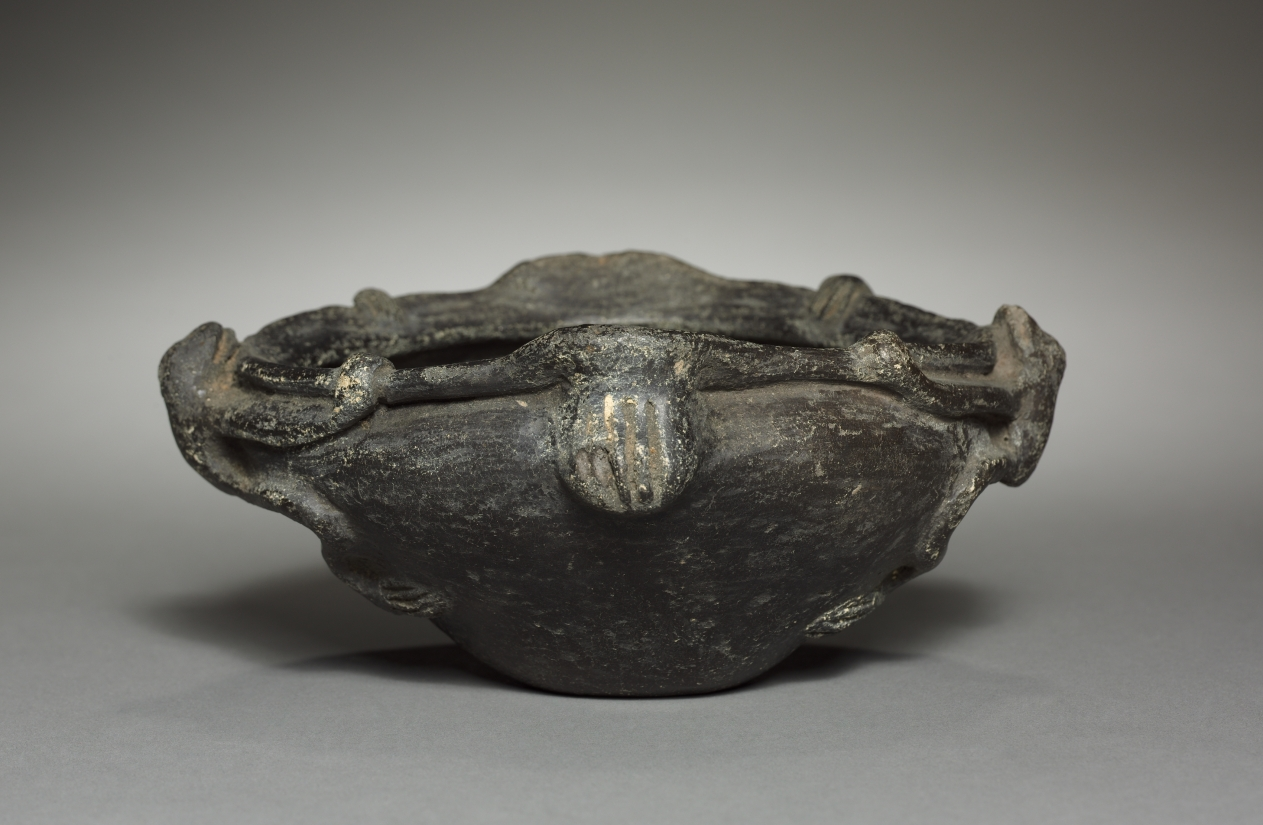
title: Bowl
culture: Colombia, 19th-20th century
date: before 1921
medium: black ware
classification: Ceramic